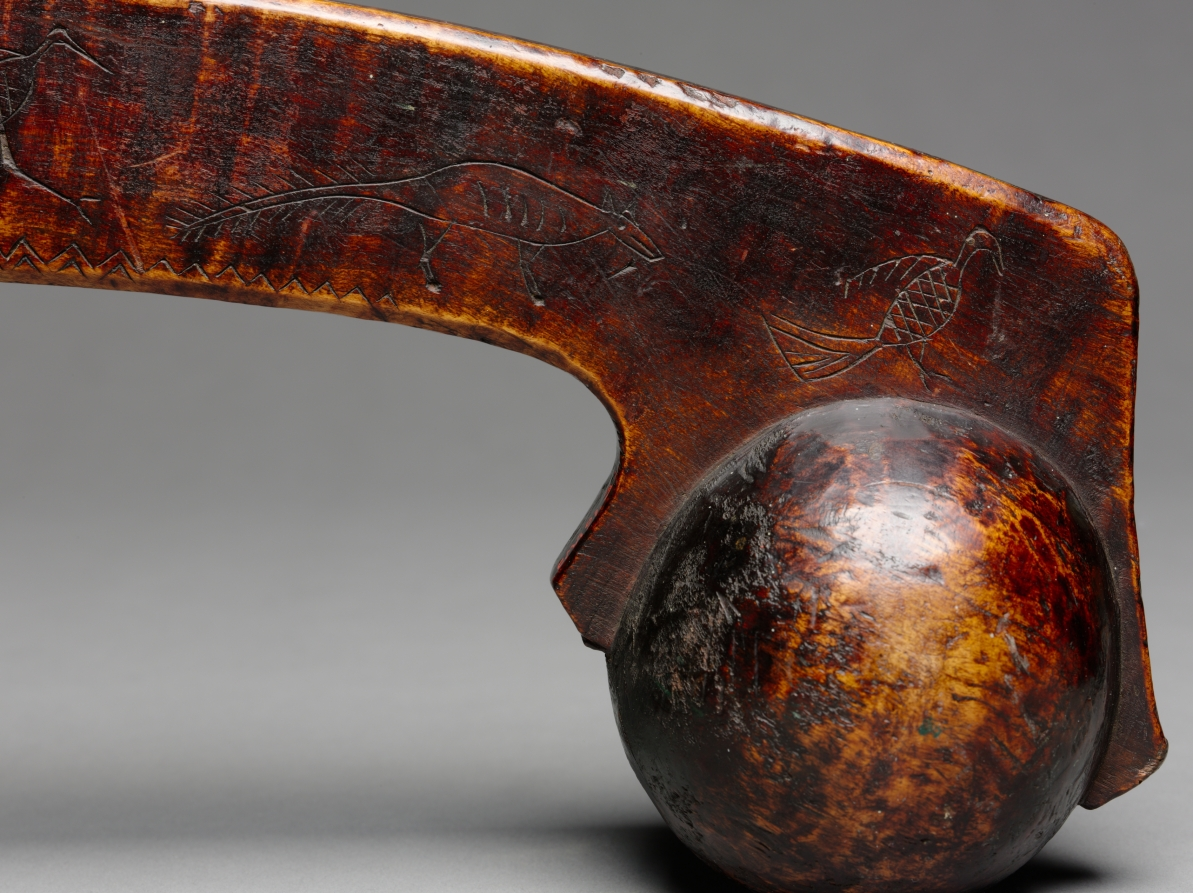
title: Ball-Headed War Club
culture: Native North America, Northeastern Woodlands, Great Lakes, Anishinaabe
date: late 1700s–early 1800s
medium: wood (maple?)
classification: Implements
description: The ball at the striking end of this club is clenched in an abstract, jawlike form that likely refers to a protector animal who endowed the owner with power. Incised on the shaft is a rich record of doodemag (singular, doodem, “totem”)—animals representing other-than-human progenitors from which Anishinaabe peoples trace their descent. (The Anishinaabeg, a group of related Great Lakes nations, include the Odawa, Ojibwe, Potawatomi, and others.) Included is an antlered creature, perhaps a caribou, along with mammals, birds, and powerful spirit beings: the thunderbird, its wings outstretched, and perhaps the long-tailed underwater panther. When this example was made, clubs had become symbols of status and earlier ways of life, having been replaced as favored weapons by metal tomahawks and European firearms. Today, clubs are part of powwow regalia.